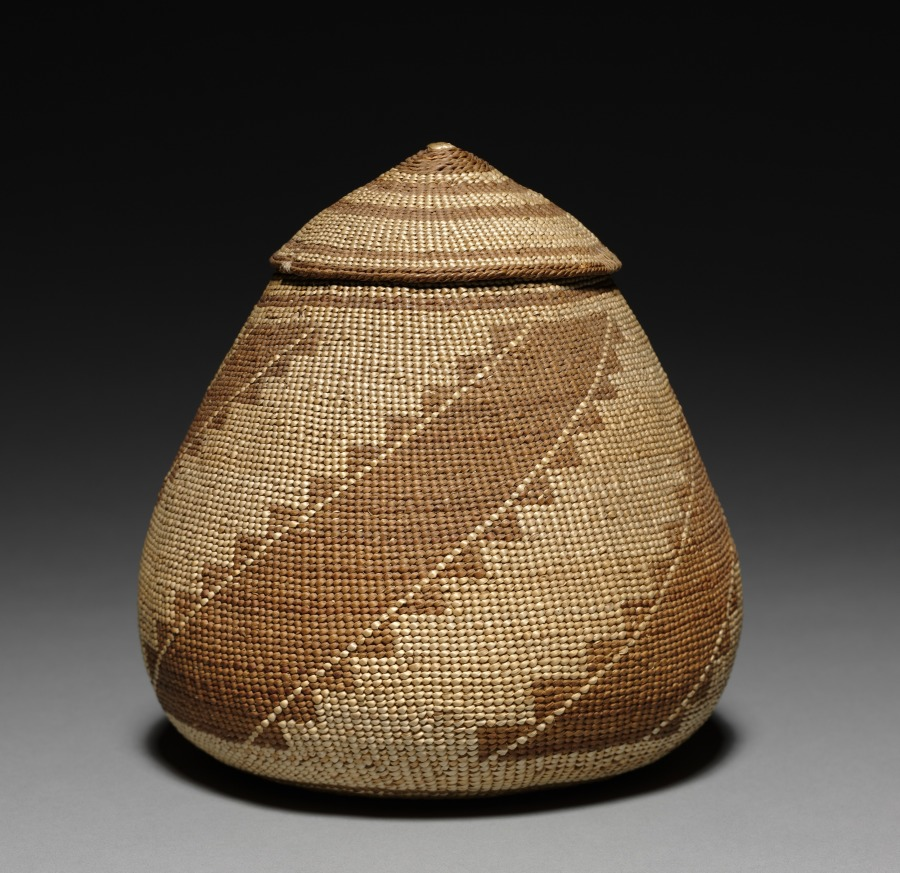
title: Tobacco Basket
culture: California, Yurok, late 19th century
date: c 1875– 1900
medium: twined grasses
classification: Basketry